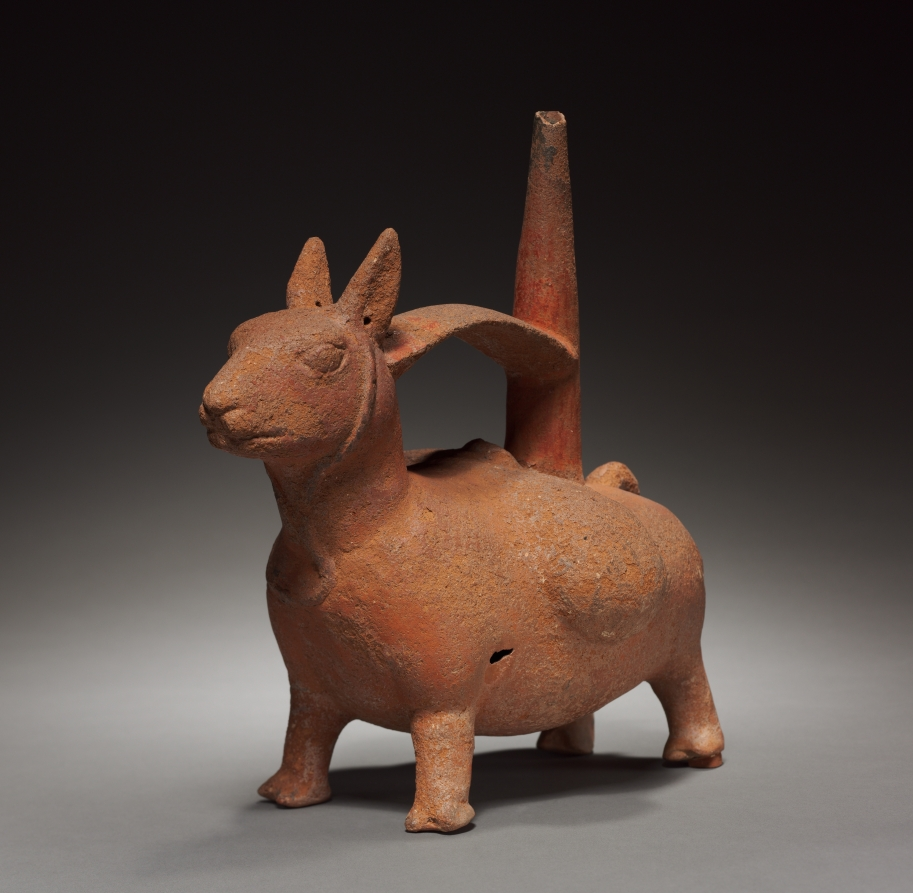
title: Llama with Packs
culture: Peru, Chimú or Inca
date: before 1532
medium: pottery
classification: Ceramic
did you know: The llama was the only burden-bearing animal, aside from humans, in ancient South America.